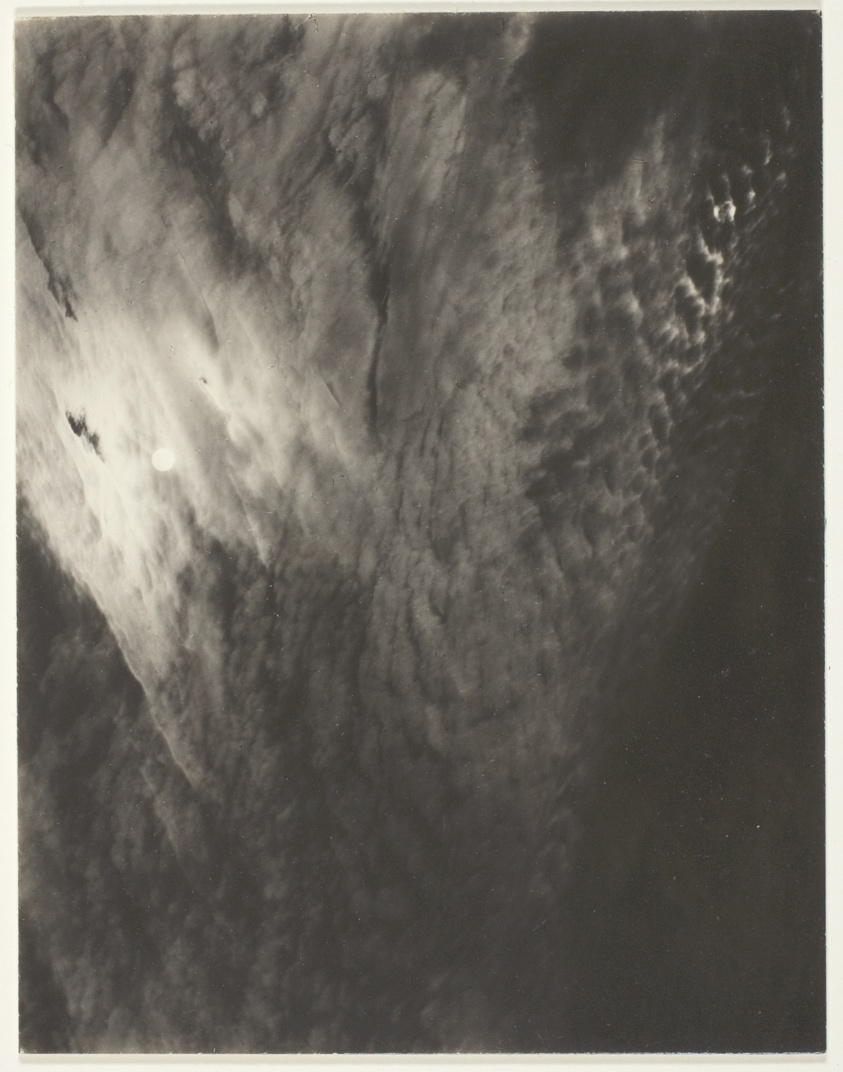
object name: Photograph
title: Equivalent, from Set A (Third Set, Print 7)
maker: Alfred Stieglitz (American, 1864–1946)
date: 1929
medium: Gelatin silver print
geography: United States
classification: gelatin silver (developing-out-paper) pr; photographic process; photography; photograph